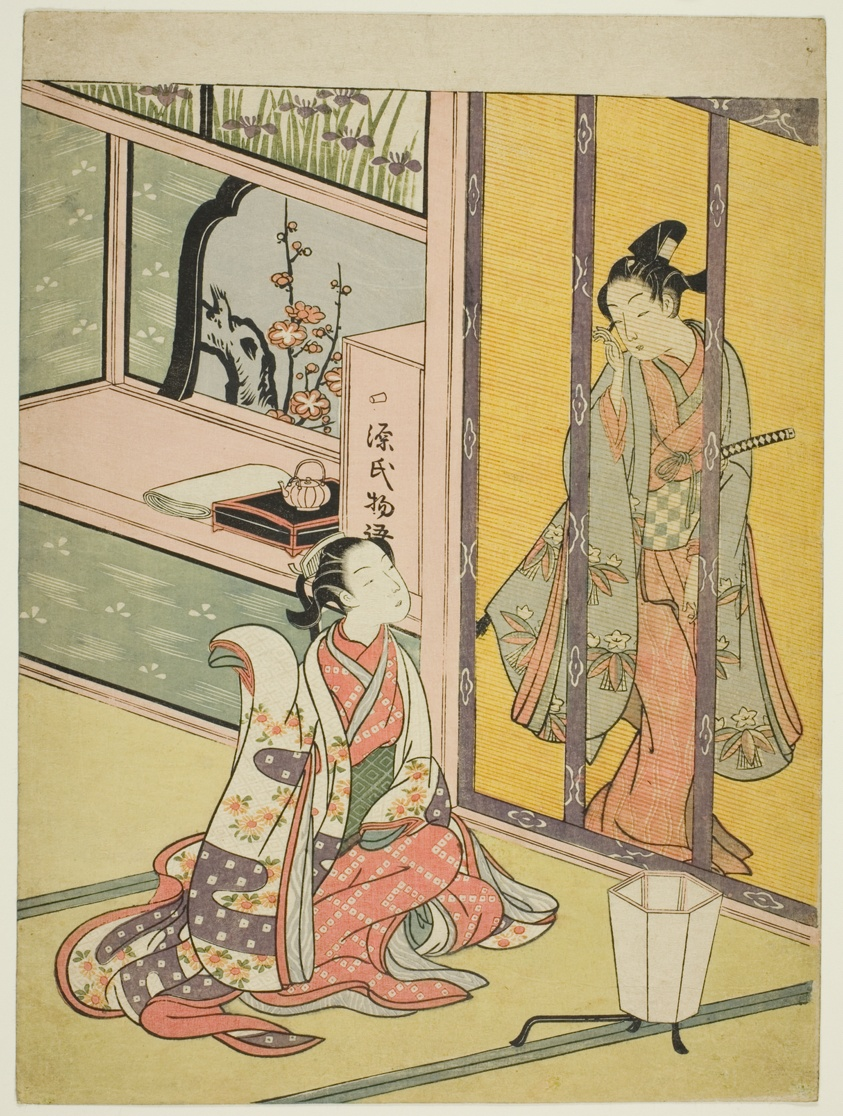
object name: Print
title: Young Man and Woman Talking through a Bamboo Blind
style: Japanese (culture or style)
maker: Attributed to Suzuki Harunobu 鈴木 春信; Japanese, 1725 (?)-1770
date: c. 1768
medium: Color woodblock print; chuban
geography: Japan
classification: woodblock print; print; asian art